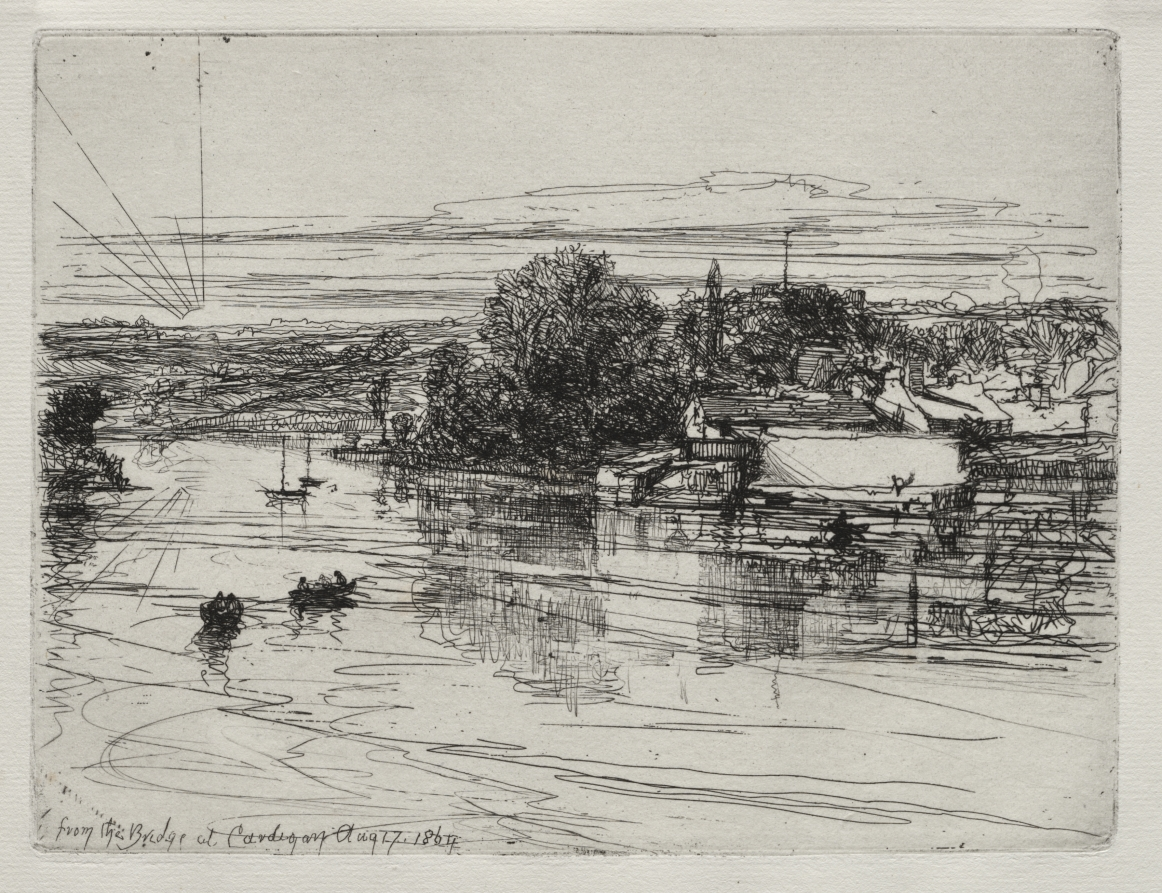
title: Cardigan Bridge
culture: England, 19th century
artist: Francis Seymour Haden (British, 1818–1910)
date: 1864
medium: etching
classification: Print